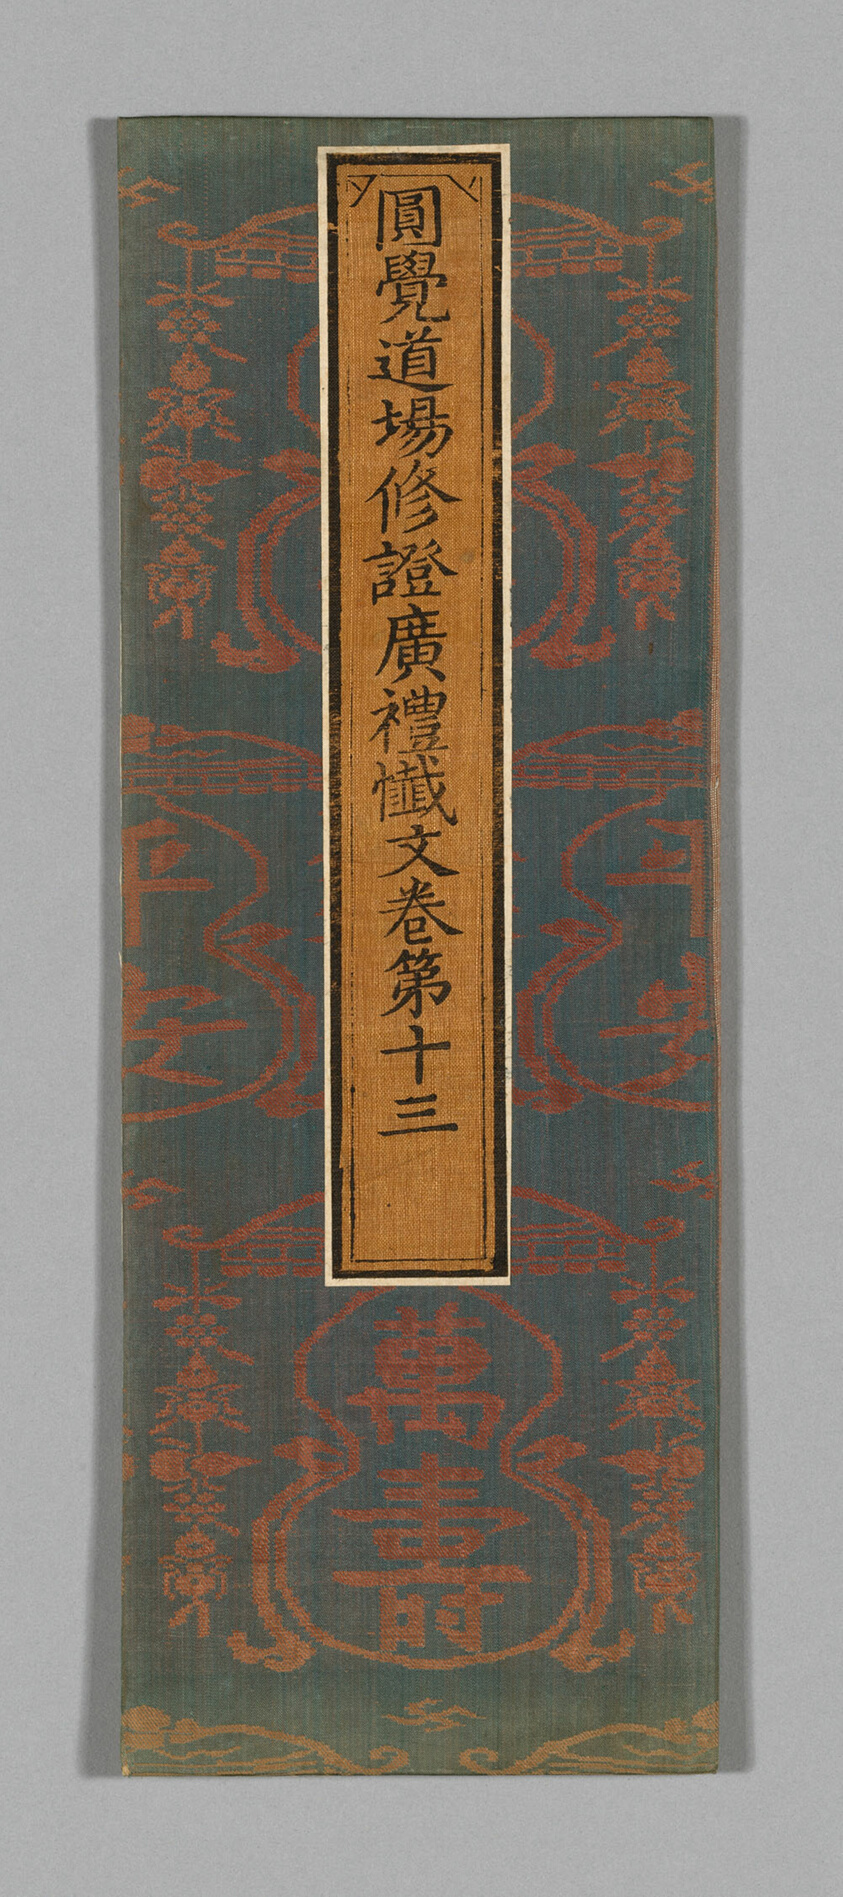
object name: Textile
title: Sutra Cover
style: ming, Chinese (culture or style), East Asian, asian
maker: China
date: Ming dynasty (1368–1644), c. 1590's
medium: Silk, warp-float faced 2:1 'Z' twill self-patterned by areas of weft-float faced 1:5 'S' twill weave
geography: China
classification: textile; weaving